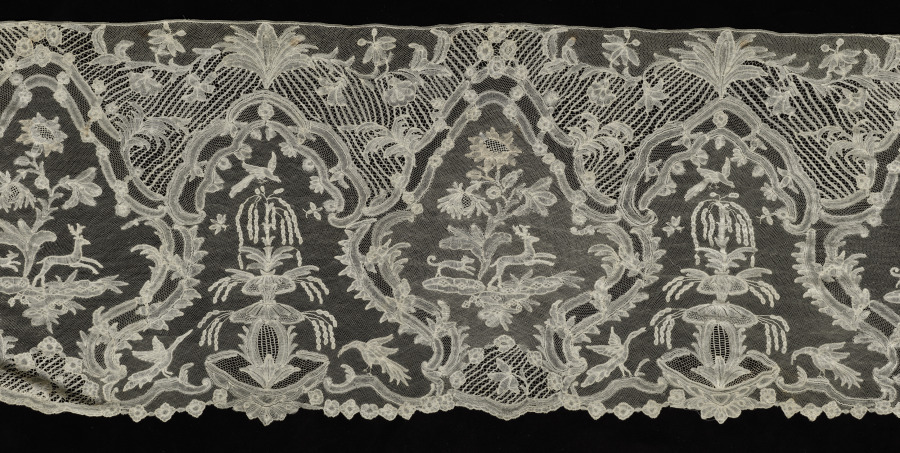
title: Lace Flounce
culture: Belgium, Brabant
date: 1700s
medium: Linen: bobbin lace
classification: Lace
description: This piece of lace depicts fountains alternating with a deer and a dog by a flowering tree.